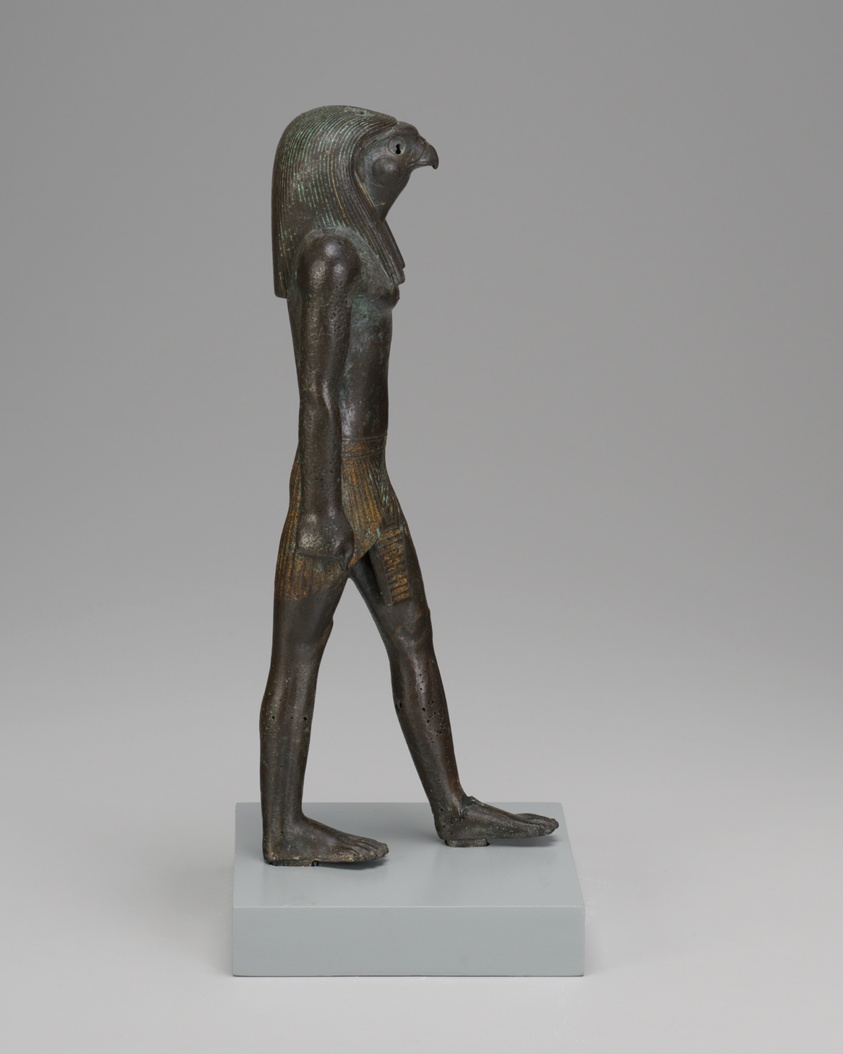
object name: Sculpture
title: Statuette of Re-Horakhty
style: third intermediate period, ancient, egyptian, twenty-fifth dynasty, twenty-first dynasty, twenty-fourth dynasty, twenty-second dynasty, twenty-sixth dynasty, twenty-third dynasty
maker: Egyptian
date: Third Intermediate Period-Late Period, Dynasty 21–26, about 1069–525 BCE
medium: Copper alloy with gilding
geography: Egypt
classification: statuette; bronze; metal; sculpture; ancient art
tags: gods (deities), birds, men, suns, Hieroglyphs, falcons